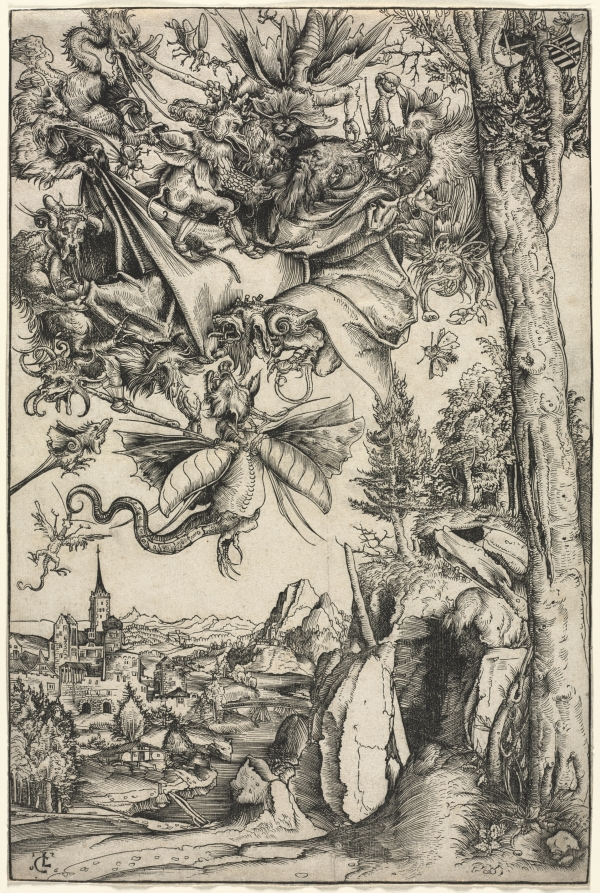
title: The Temptation of St. Anthony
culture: Germany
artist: Lucas Cranach (German, 1472–1553)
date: 1506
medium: woodcut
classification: Print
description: The group of demonic figures attacking Saint Anthony was inspired by the Martin Schongauer engraving of the same subject from about 1475, though the extensive landscape is a fine example of Cranach's individual style. The Temptation of Saint Anthony has possible connections to the Chancellor of Wittenberg University, Goswin von Orsoy (1450-1515), who was also the preceptor of the Antonite monastery at nearby Lichtenburg. The group of buildings in the scene may represent this monastery, which was later destroyed; the monastery also owned a chapel in Wittenberg where there was an altarpiece of Saint Anthony.